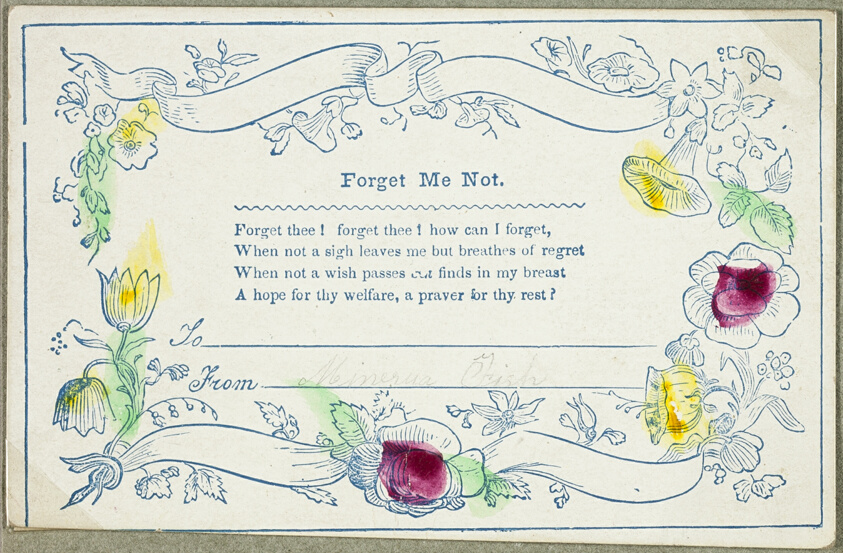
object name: Print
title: Forget Me Not (valentine)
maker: Unknown Artist; American or English, 19th century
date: c. 1830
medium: Engraving in blue ink with hand-coloring and traces of graphite on ivory card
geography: United States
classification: valentine; prints and drawing; print